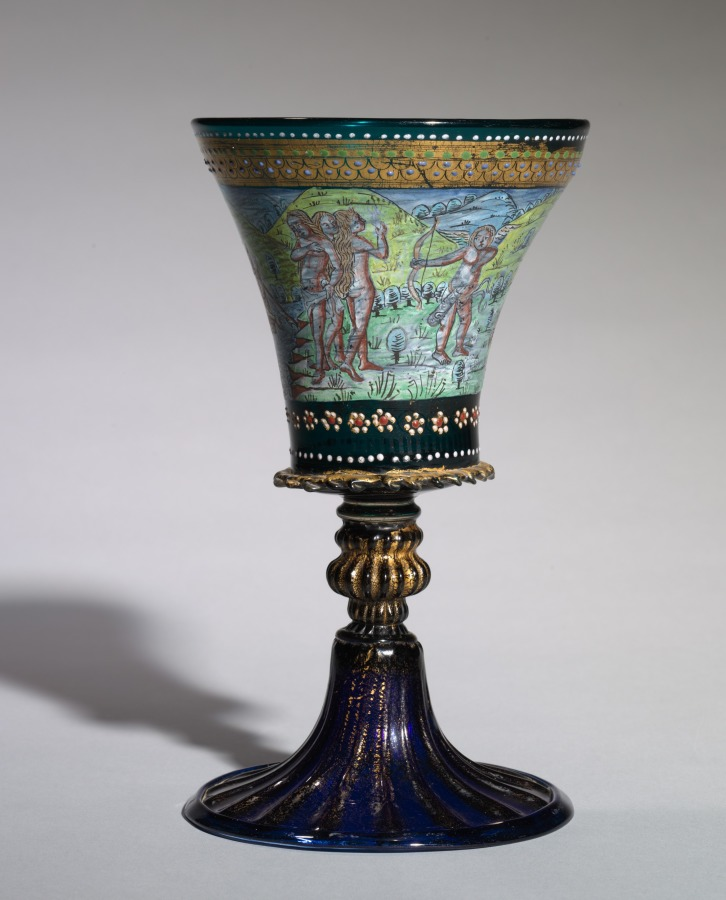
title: The Peddler Goblet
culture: Italy, Venice (Murano), 19th century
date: 1800s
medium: green and blue glass, enameled and gilded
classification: Glass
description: In the decoration of this goblet, the peddler, fast asleep under a tree, is robbed by monkeys. The same subject appears on the famous "Monkey Cup" in The Cloisters of The Metropolitan Museum of Art. It was obviously appealing because peddlers were traditionally believed to have many of the same vices as monkeys. Another part of the decoration includes a scene of Venus emerging from the sea, and the Three Graces.